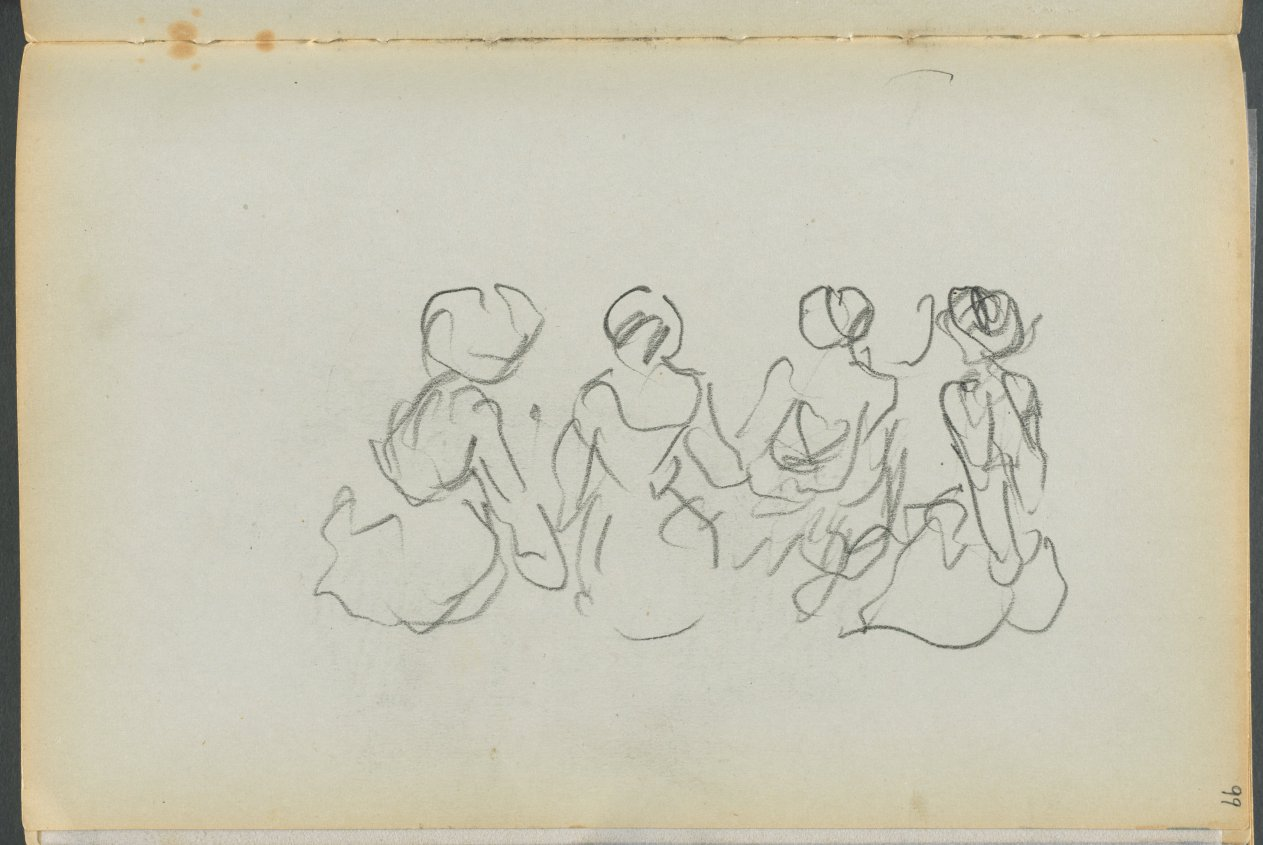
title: Sketchbook- The Granite Shore Hotel, Rockport, page 099: Seated Female Figures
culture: America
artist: Maurice Prendergast (American, born Newfoundland [now Canada], 1858–1924)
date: 1905–10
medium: graphite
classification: Bound Volume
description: This sketchbook contains 72 pages of pencil drawings and 9 watercolors of Cape Ann. On the inside of the cover Prendergast wrote the address of the Granite Shore Hotel in Rockport, Massachusetts.